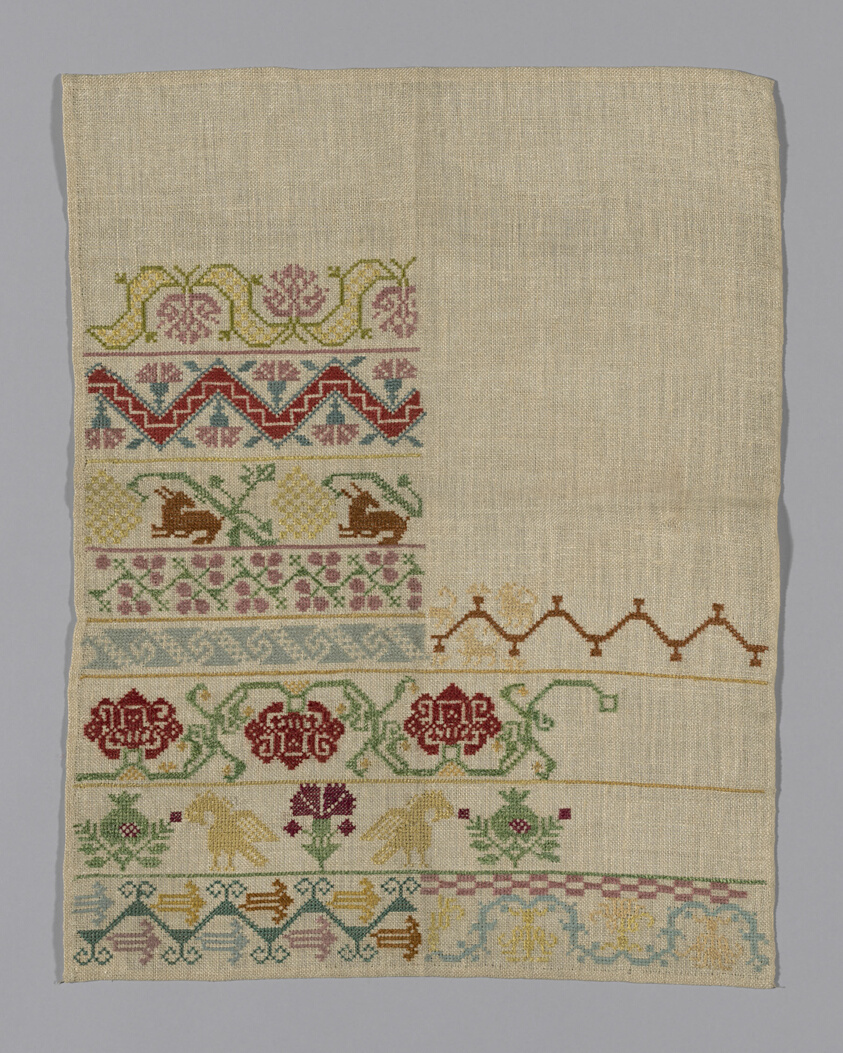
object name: Textile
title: Sampler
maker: England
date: 1775/1825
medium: Linen, plain weave; embroidered with silk in cross stitch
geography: England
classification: textile; needlework (visual works); sampler